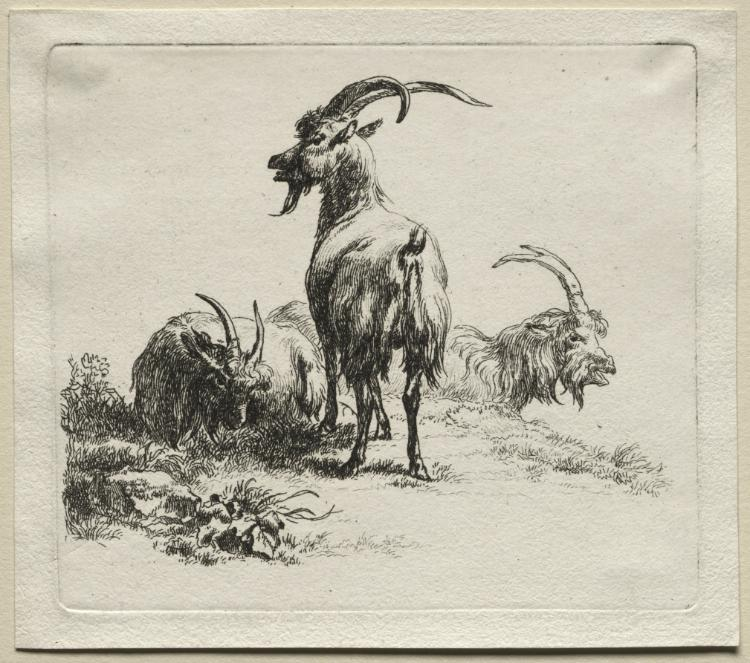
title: Animalia: Three Goats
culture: Netherlands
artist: Nicolaes Berchem (Dutch, 1620–1683)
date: 1635–83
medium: etching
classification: Print